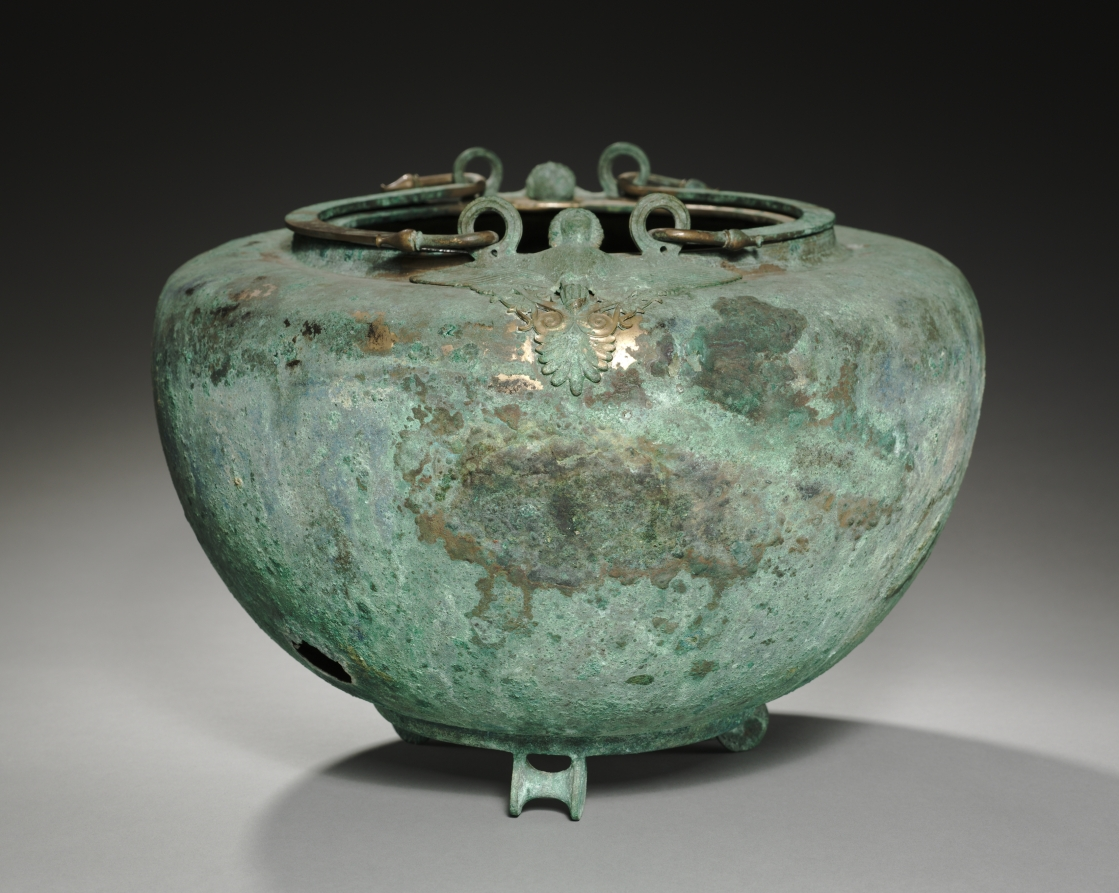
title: Lebes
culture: Greece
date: c. 480–460 BCE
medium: bronze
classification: Metalwork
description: This bronze cauldron has a ring base with three spool feet. Appliqués shaped like birds with the heads of women decorate the shoulder on either side of the vessel. Two handles are fastened to loops on the top of each creature’s wings. The bird-women may represent sirens, mythical creatures that lured sailors with their singing, or harpies, wind spirits that stole food from the starving.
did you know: The green surface found on old bronze is a corrosion product formed when copper in the metal reacts to carbon dioxide and water.